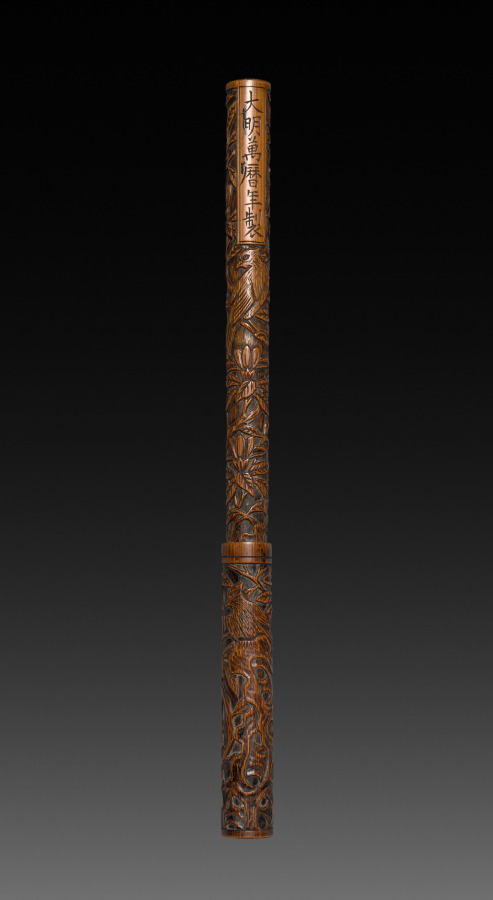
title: Brush with Carved Design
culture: China, Ming dynasty (1368-1644), Wanli mark and reign (1573-1619)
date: 1573–1619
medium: carved bamboo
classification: Wood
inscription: 大明萬曆年製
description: In China, access to political power was granted to those who passed the civil service examinations, a system that offered official service only at a high level of education. Chinese literati-officials, whose daily routine involved administrative work in an office, enjoyed precious objects on their writing desks that offered distraction and demonstrated good taste. By the Ming (1368–1644) and Qing (1644–1911) dynasties, these utensils of the literati studio became also collectibles and were treasured as artworks. A brush, like this one, was essential for both administrative tasks and for artistic creation. The bamboo brush handle and cap were carved in shallow relief with branches, leaves, birds, and flowers. The brush tip was made from fine white animal hairs.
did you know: The inscription on this brush with a bamboo cap reads: Made during the Wanli Era of the Great Ming [dynasty].